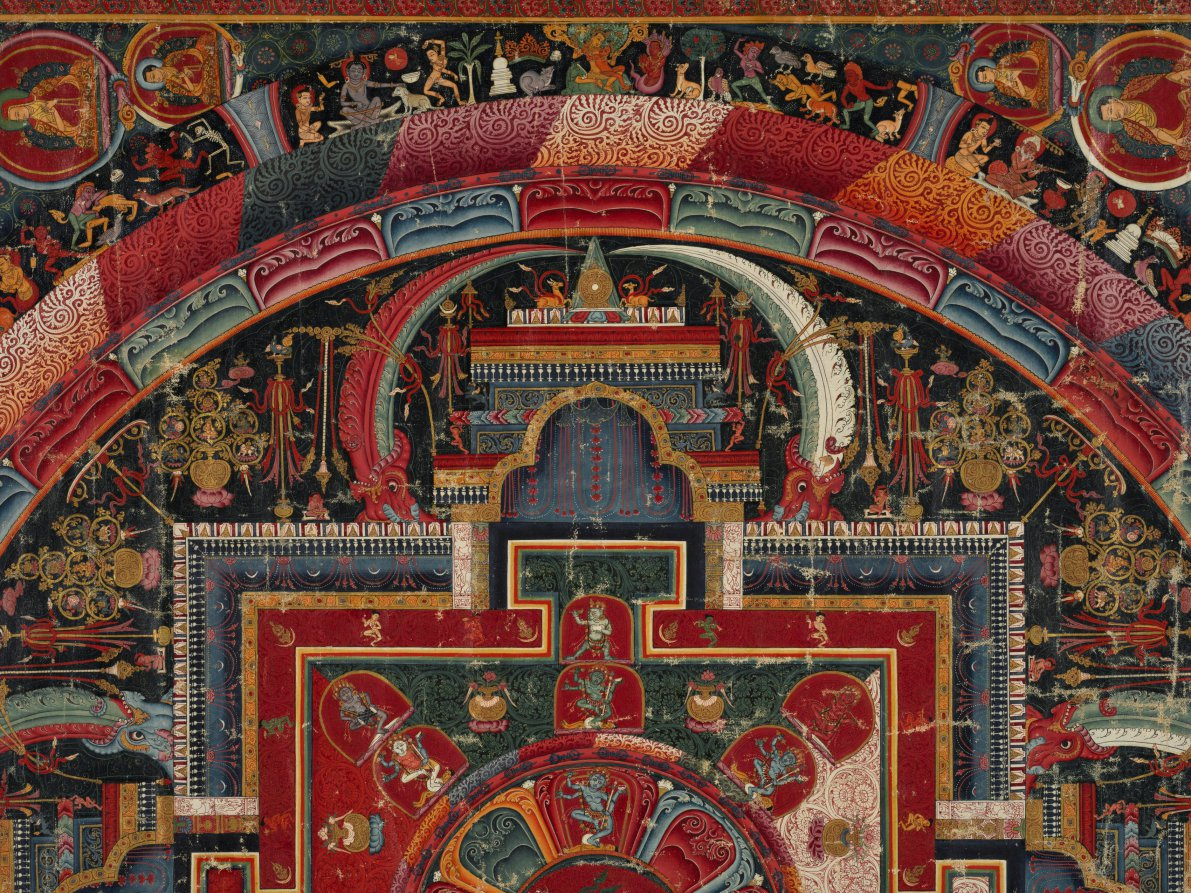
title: Twenty-three Deity Nairatma Mandala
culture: Central Tibet, Sakya-affiliated monastery, 14th century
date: c. 1375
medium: Gum tempera, ink, and gold on cloth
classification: Painting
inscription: The inscription along the bottom says: Twenty-three deity Nairatma Mandala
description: One of the main types of imagery in tantric Buddhist art is the mandala, a two-dimensional diagram of the realm of an enlightened being. This mandala depicts the palace of Nairatma, who dances in the center surrounded by her entourage. Using the painting as a guide, the tantric practitioner in meditation mentally projects the two-dimensional plan into three-dimensional space and enters into it. The outermost ring contains depictions of the cremation grounds, where corpses are being burned and consumed, as well as tantric yogis and masters who work there in order to understand the impermanence of the body, defeat their fear of death, and overcome irrational aversions to impure aspects of life. Virupa is depicted twice, always pointing to arrest the sun with his raised left hand. He sits among the row of lineage masters along the top edge, and is also depicted in the topmost segment of the ring of cremation grounds, being served a cup of liquor. Along with lineage masters at the top of this impressive painting, bodhisattvas and important masters are depicted in the spandrels, each identified by an inscription.